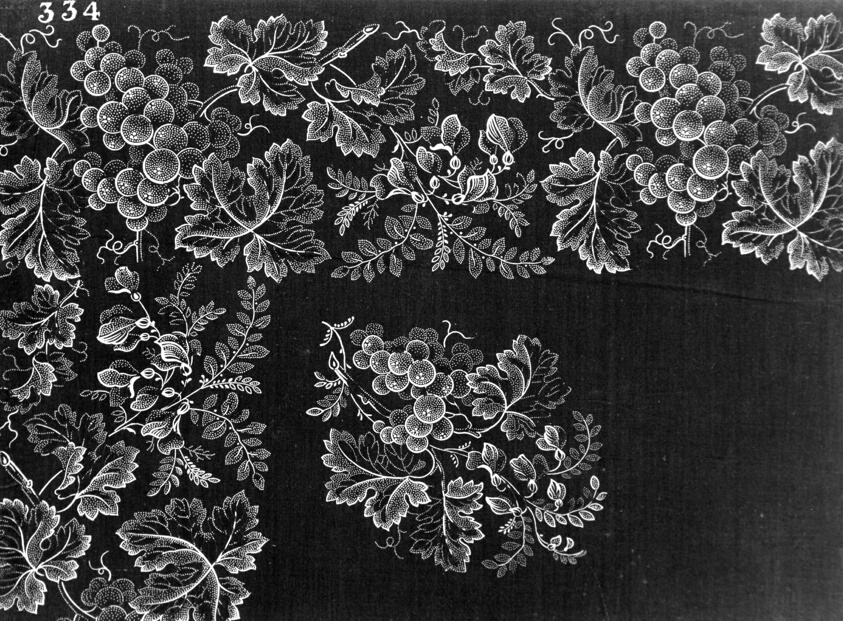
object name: Book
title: Mouchoirs (Volumes I and II)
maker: France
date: 19th century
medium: Kerchief or shoulder scarf swatches; cotton, plain weave, printed; total of swatches: Volume I: 108; Volume II: 112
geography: France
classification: textile; book